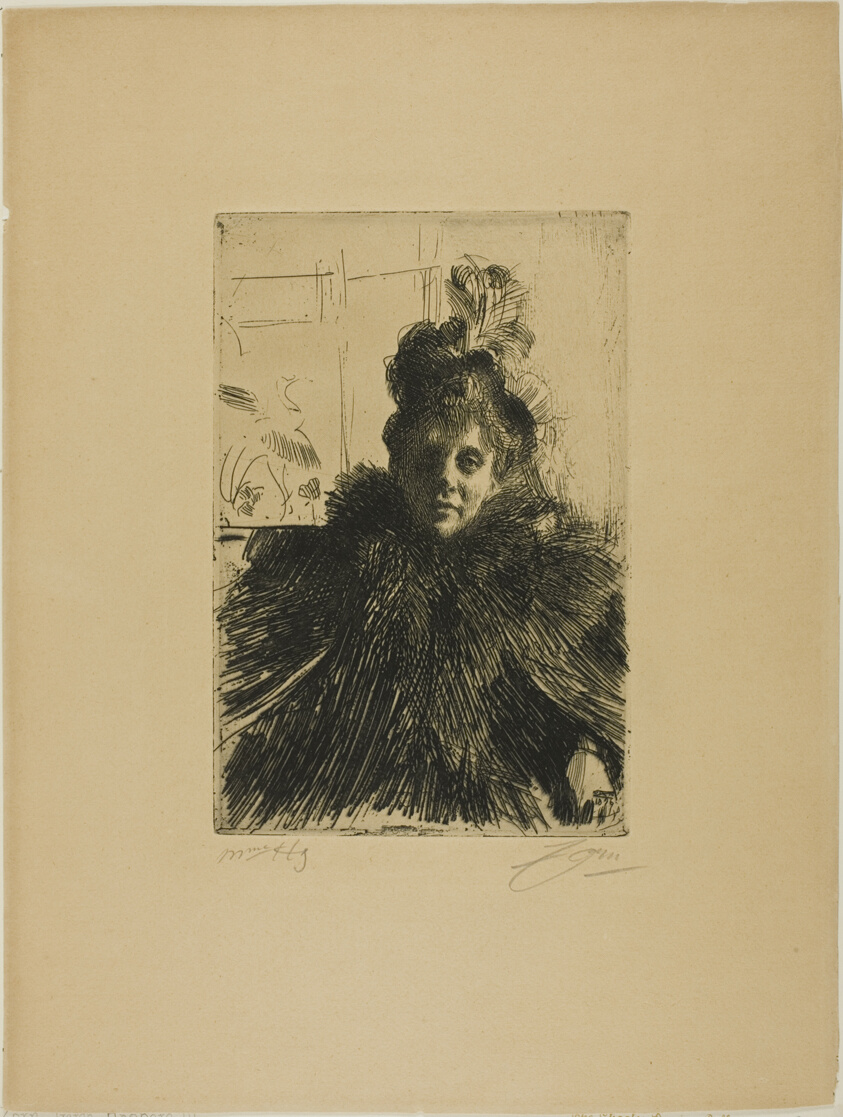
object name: Print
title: Gerda Hagborg III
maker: Anders Zorn (Swedish, 1860-1920)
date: 1896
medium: Etching on tan wove paper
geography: Sweden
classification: etching; print; prints and drawing